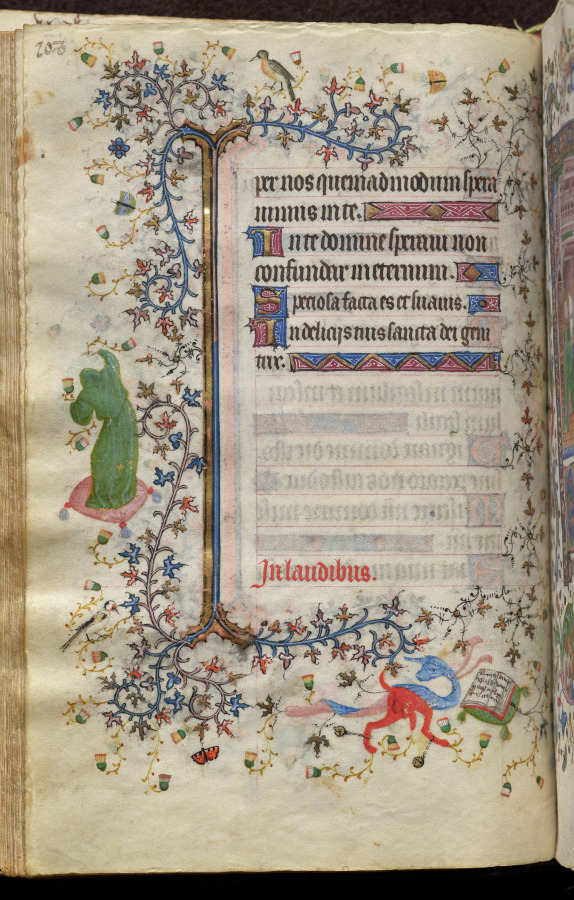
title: Hours of Charles the Noble, King of Navarre (1361-1425): fol. 54v, Text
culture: France, Paris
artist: Master of the Brussels Initials and Associates (French)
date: c. 1405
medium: ink, tempera, and gold on vellum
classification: Bound Volume